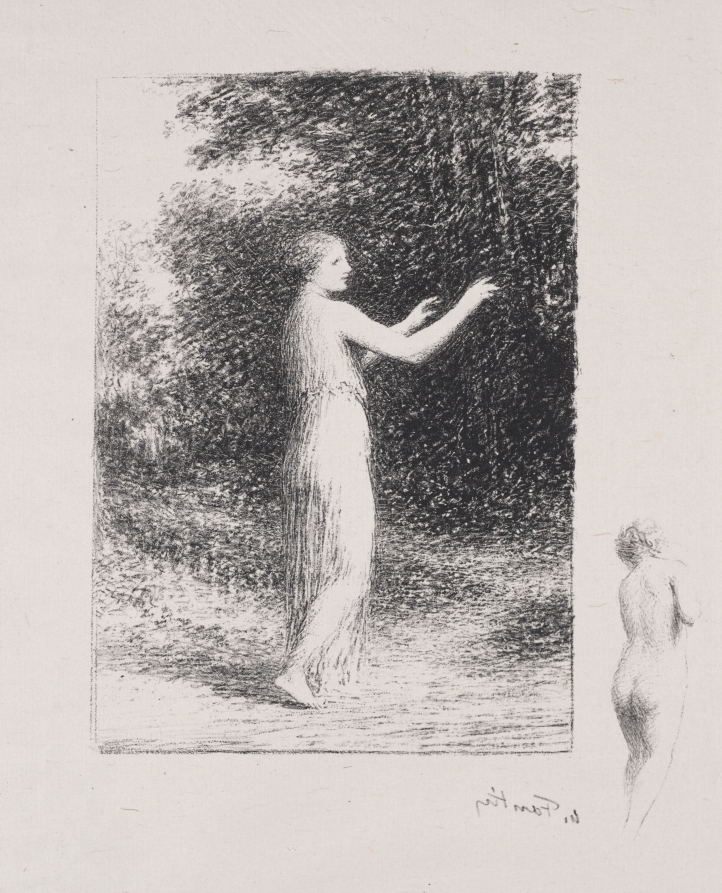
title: The Beggar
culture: France, 19th century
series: Illustrations for the Poems of André Chénier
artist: Henri Fantin-Latour (French, 1836–1904)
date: 1903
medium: lithograph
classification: Print